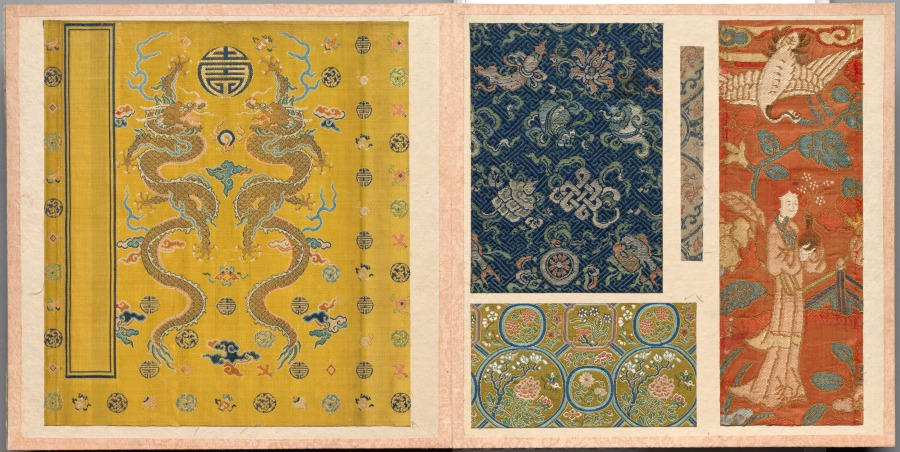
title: Album of Textile Samples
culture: Japan and China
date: 1700s–1800s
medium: silk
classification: Textile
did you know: This album contains 46 pages with 156 mounted Chinese or Japanese textile samples.